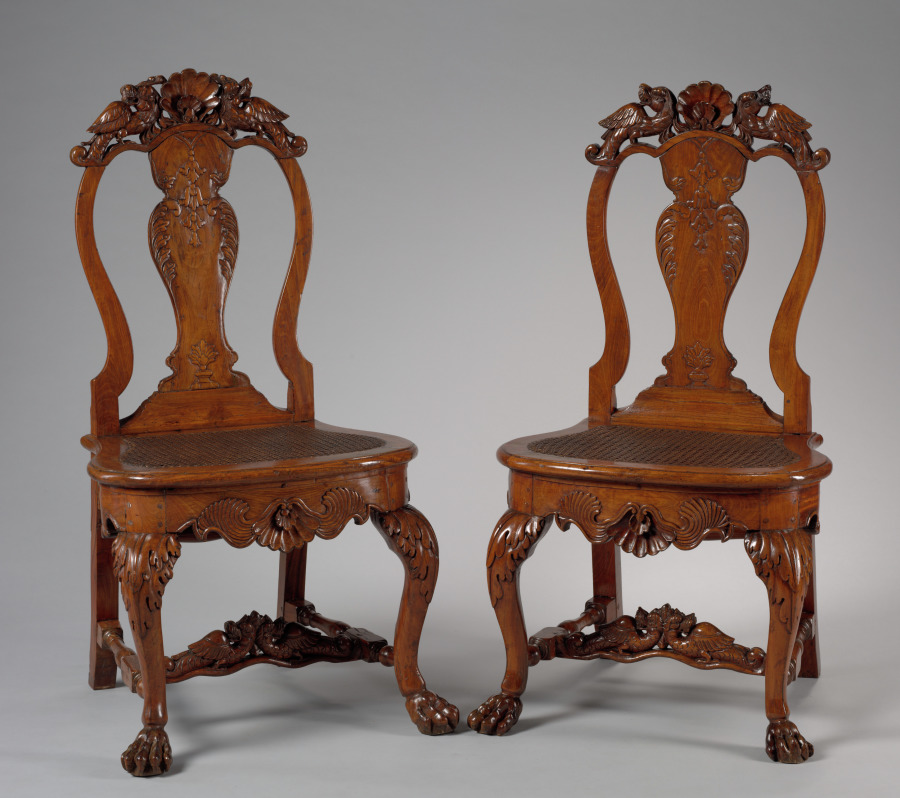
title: Pair of Side Chairs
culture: Netherlands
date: 1705–15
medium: tulipwood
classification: Furniture and woodwork